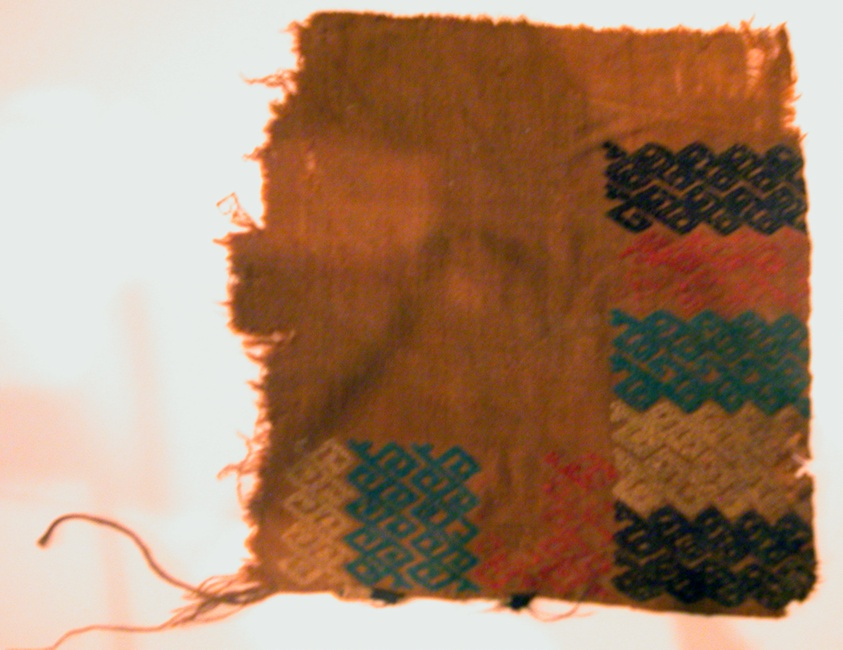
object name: Textile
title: Fragment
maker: Peru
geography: Peru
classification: textile; needlework (visual works)